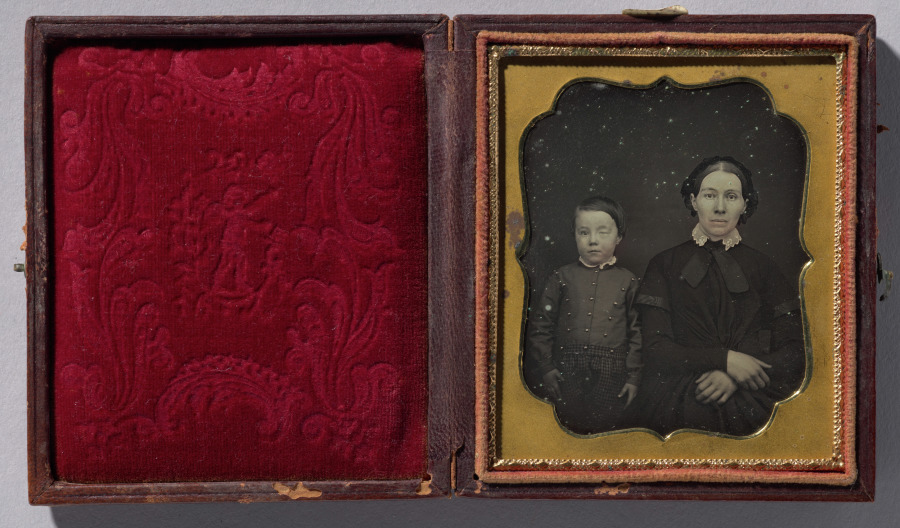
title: Mother with son with blind right eye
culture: America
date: c. 1855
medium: daguerreotype, sixth plate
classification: Photograph